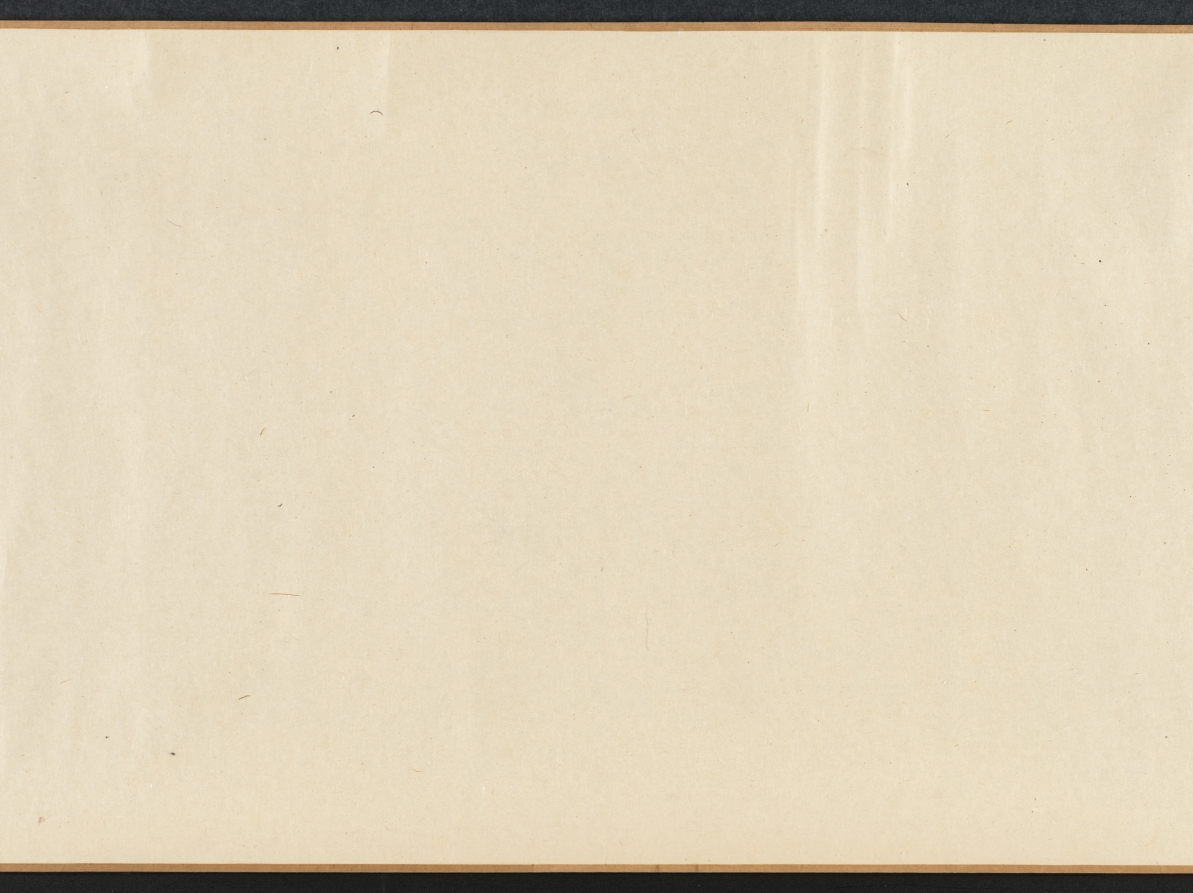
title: Landscape with Bamboo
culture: China, Yuan dynasty (1271-1368)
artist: Song Ke (Chinese, 1327–1387)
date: 1300s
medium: Handscroll; ink on paper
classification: Painting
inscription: 東吳宋克戲為仲幾畏友圖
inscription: 2 colophons and 14 additional seals: 1 seal of Yü Chung-chi (14th c.); 1 seal of Wu Ch'eng (1469 jinshi); 1 colophon and 2 seals of Wu K'uan (1435–1504); 1 colophon and 9 seals of Cheng Qi (1911–1988); 1 seal unidentified.